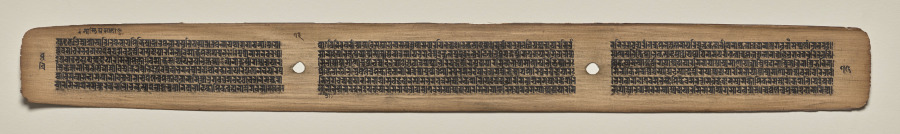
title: Text, Folio 73 (verso), from a Manuscript of the Perfection of Wisdom in Eight Thousand Lines (Ashtasahasrika Prajnaparamita-sutra)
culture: Eastern India, Bihar, Vikramashila Monastery. Painting: Nepal, Kathmandu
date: Sunday, September 14, 1119 (year 239 of the Newar Samvat in the month of Ashvina)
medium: gum tempera and ink on palm leaves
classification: Painting